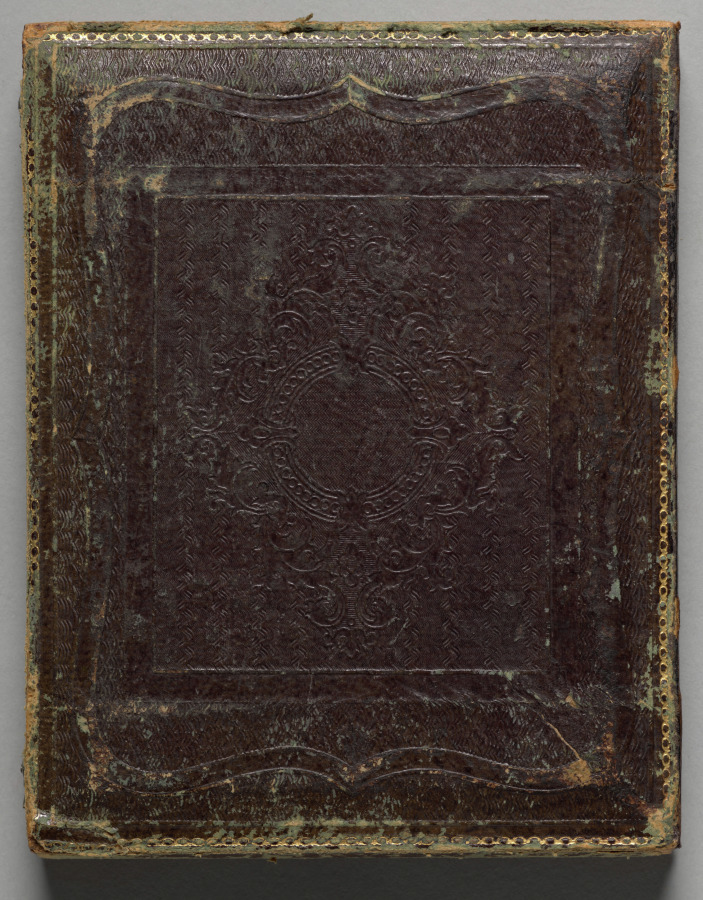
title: Buggy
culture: America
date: c. 1853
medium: daguerreotype, half-plate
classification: Photograph